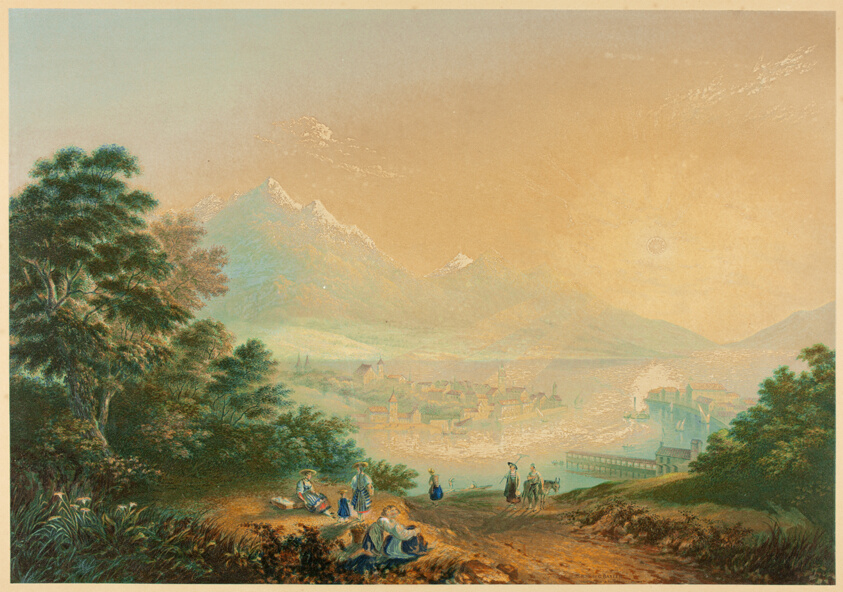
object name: Print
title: Lake Lucerne, Switzerland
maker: George Baxter (English, 1804-1867)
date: 1857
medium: Steel engraving colored with wooden blocks, on paper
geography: England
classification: wood engraving; print; prints and drawing